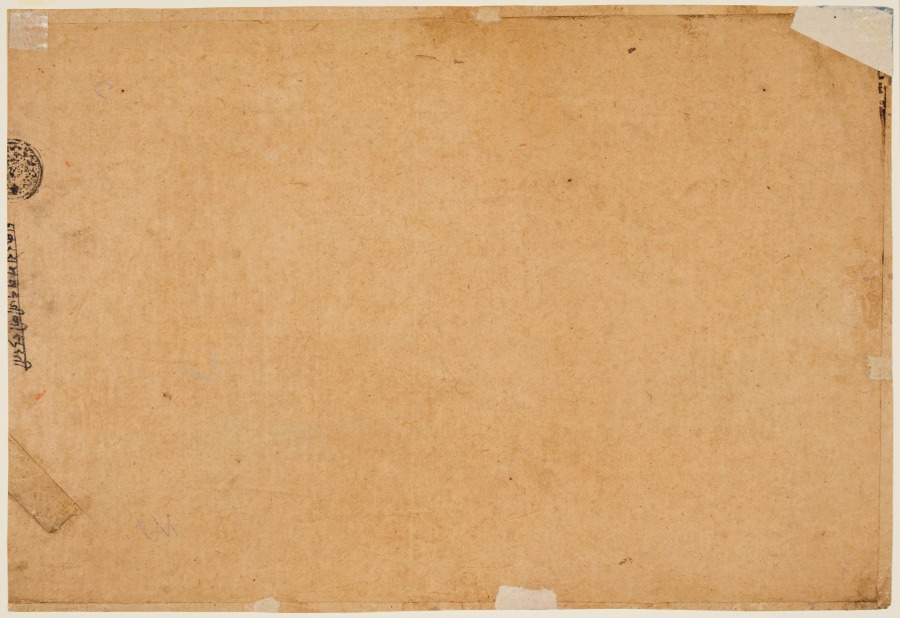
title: Raja Ram Chand of Amber (r. 1667–88) Hunting Wild Boar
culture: Northwestern India, Rajasthan, Rajput Kingdom of Amber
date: c. 1670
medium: gum tempera and gold on paper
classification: Painting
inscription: ṭhākura rāma cada jī kī suratī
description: A Rajput king on a nocturnal hunt points his rifle toward three boars standing amid faint tufts of grass. The raja and his two attendants sit concealed behind a hunting blind, and we see their figures through a thin white screen that blends with the mists and sands in the milky moonlight. The raja, dressed in a green jama (long belted tunic), eyes his quarry intently, nearly ready to fire a bullet, and his attendants anxiously observe.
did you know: The full moon with face evokes the dynasty’s name “Chand” or moon.